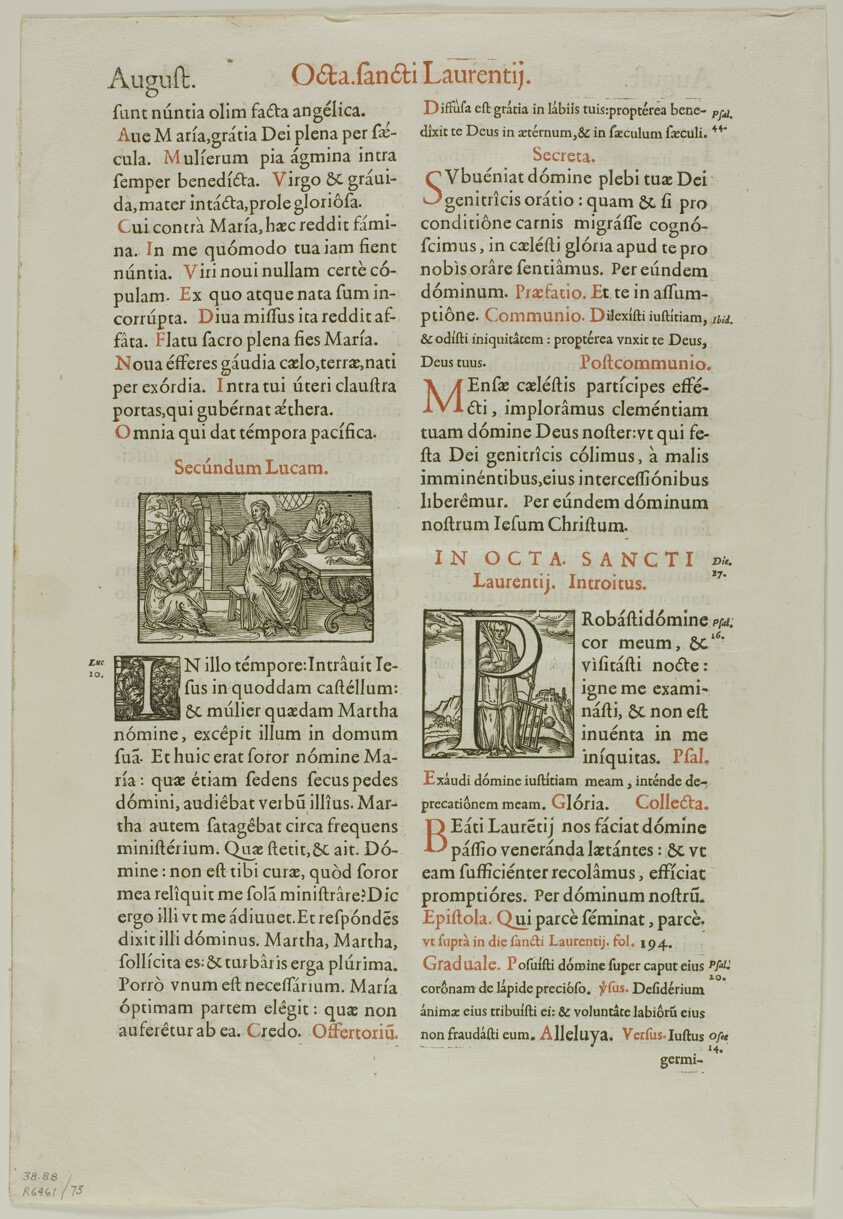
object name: Print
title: Illustrations from Missale secundum ritum et ordinem sacri ordinis Praemonstratensis, plate 73 from Woodcuts from Books of the XVI Century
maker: Unknown Artist (French, 16th century); assembled by Max Geisberg (Swiss, 1875-1943)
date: 1578, assembled into portfolio 1937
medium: Woodcut on paper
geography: France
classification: woodcut; print; prints and drawing